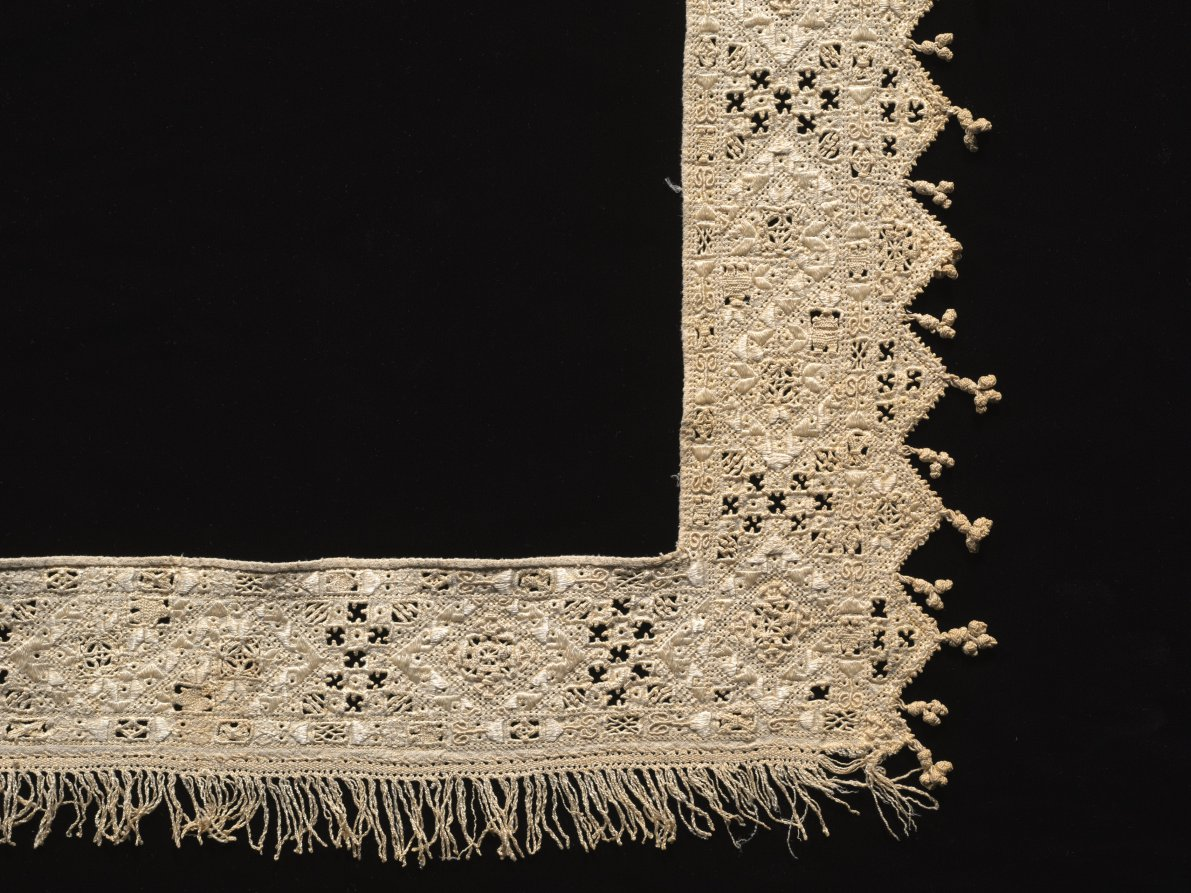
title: Lace Edging for a Sheet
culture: Italy, 1600-1799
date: 1600–1799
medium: Linen: needle lace (cutwork) and silk embroidery, silk fringe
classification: Lace